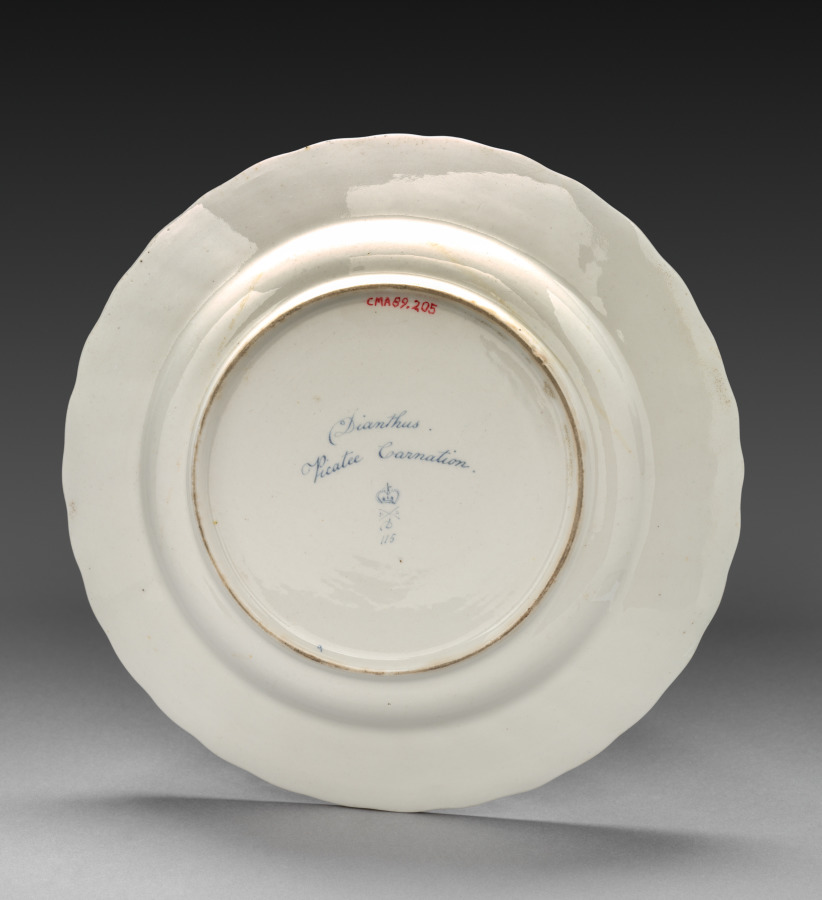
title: Plate from Dessert Service: Picatee Carnation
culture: England, Derby, 18th century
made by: Derby (Crown Derby Period) (British)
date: c. 1800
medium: porcelain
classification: Ceramic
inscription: inscribed in blue on back: Dianthus./Picatee carnation./crown/crossed batons and dots/D/115. Near edge: 9.